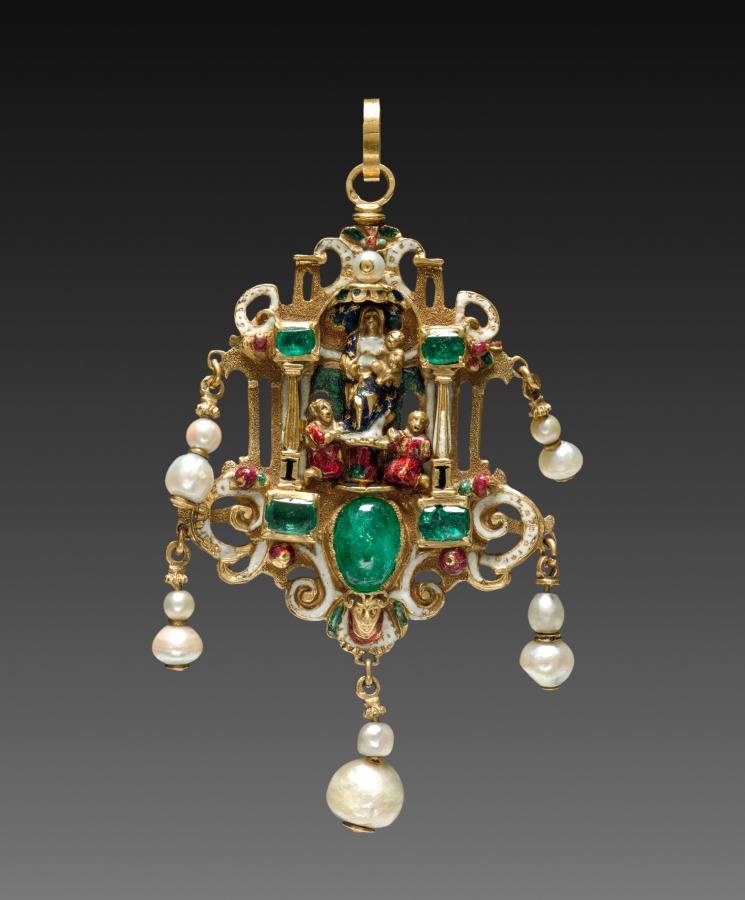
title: Pendant with Virgin and Child with Saints and Saint John the Evangelist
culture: Italy, late 16th century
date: late 1500s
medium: enameled gold with pearls and emeralds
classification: Jewelry